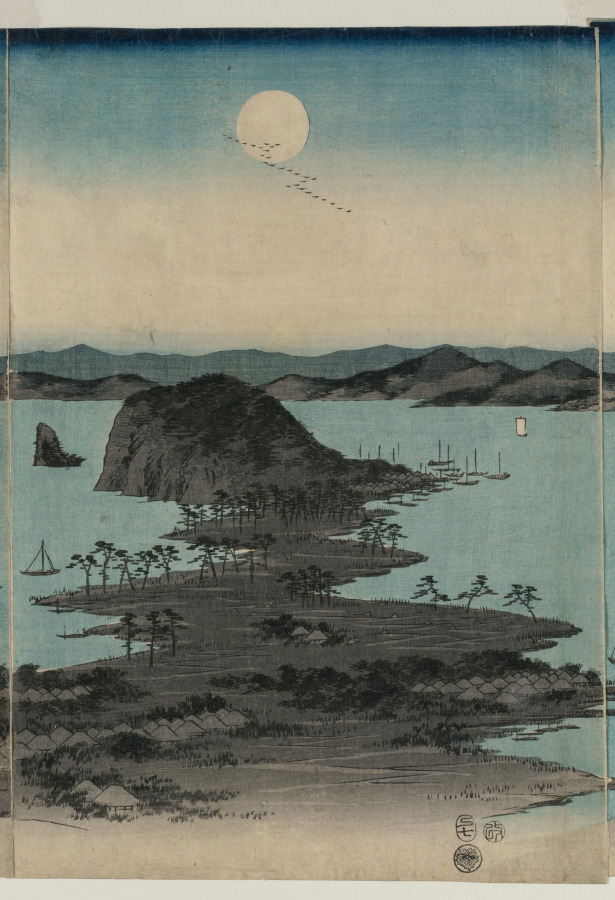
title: Full Moon on Kanazawa, Musashi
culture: Japan, Edo period (1615–1868)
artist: Utagawa Hiroshige (Japanese, 1797–1858)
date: 1857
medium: One of a triptych of color woodblock prints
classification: Print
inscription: Signature: Hiroshige hitsu (left panel). Artist Seal: Ichiryusai. Publisher: Okazawaya Taheiji. Censorship seal: aratame.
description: Late in his career, Hiroshige explored the poetic theme of setsugekka, “snow, moon, and flowers,” in a set of three triptychs. This panoramic scene shows the autumn moon over Kanazawa, near Tokyo. Hiroshige’s contemporaries would have recognized the coastline dotted with villages, fishing boats, and the distinctive double-arched bridge at the bottom right.